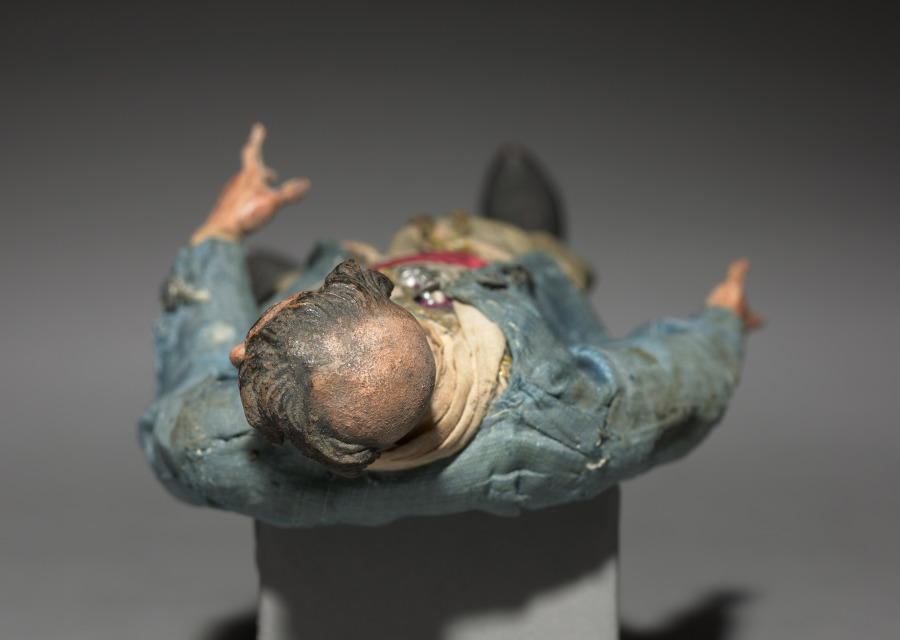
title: Figure from a Crèche: Standing Man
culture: Italy, Naples, late 18th-early 19th century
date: 1780–1830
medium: painted wood and terracotta with various textiles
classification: Sculpture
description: The practice of creating scenes of the Nativity for the home dates from the early 1700s in Italy, where people began to set up doll-like figures of about a foot or less in height. The custom was particularly popular in Naples around 1800, where crèche scenes (crèche means cradle, or crib) included many figures, whose heads and hands of painted terracotta, stuffed cloth bodies, and clothing adapted from contemporary local costumes gave them an amazingly realistic character. Representations of the birth of Jesus can be traced to the first few centuries of Christianity. Both living creatures and sculptural depictions of them were used from early times. By the late middle ages it was customary to create life-size figures of wood or stone, naturalistically painted, to represent the characters who participated in the events of Jesus's early life. These sculptures were then arranged in scenes illustrating one or both of the most important of these events, the Adoration of the Shepherds and the Adoration of the Magi—the three kings from the East who came to pay homage to the Christ child. Used in churches, these large figures were especially popular in Italy, Central Europe, Spain, and Portugal.